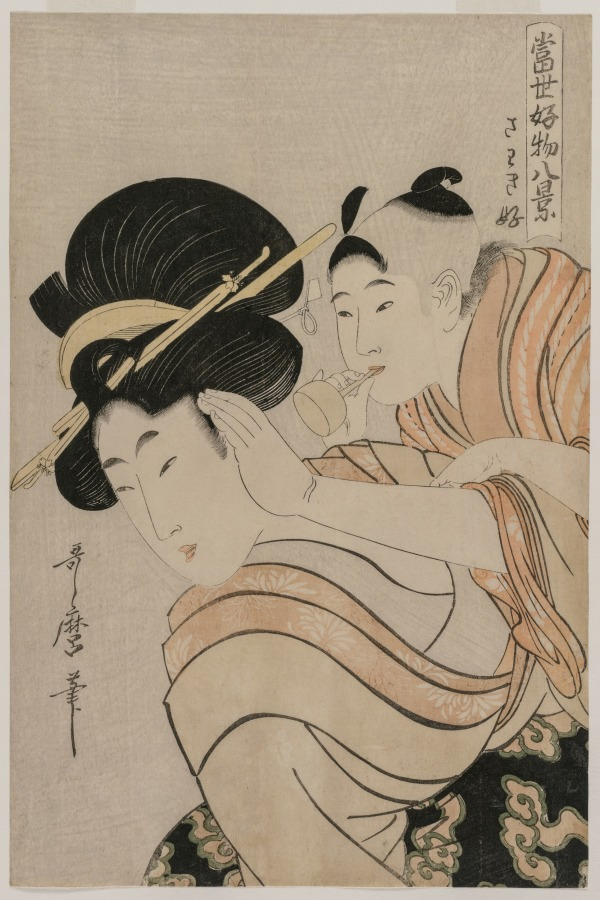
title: Fond of Noise from the series Eight Views of Favorite Things of Today’s World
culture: Japan, Edo period (1615–1868)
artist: Kitagawa Utamaro (Japanese, c. 1754–1806)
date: late 1790s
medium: color woodblock print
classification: Print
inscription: Artist's signature: Utamaro hitsu.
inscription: No publisher's mark.